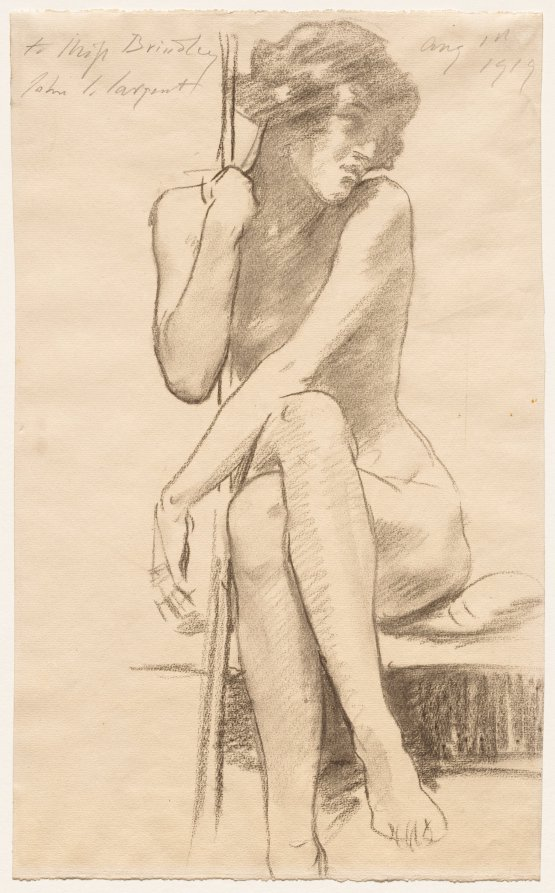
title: Female Nude Seated on a Low Bench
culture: America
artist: John Singer Sargent (American, born Italy, 1856–1925)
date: 1919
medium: charcoal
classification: Drawing